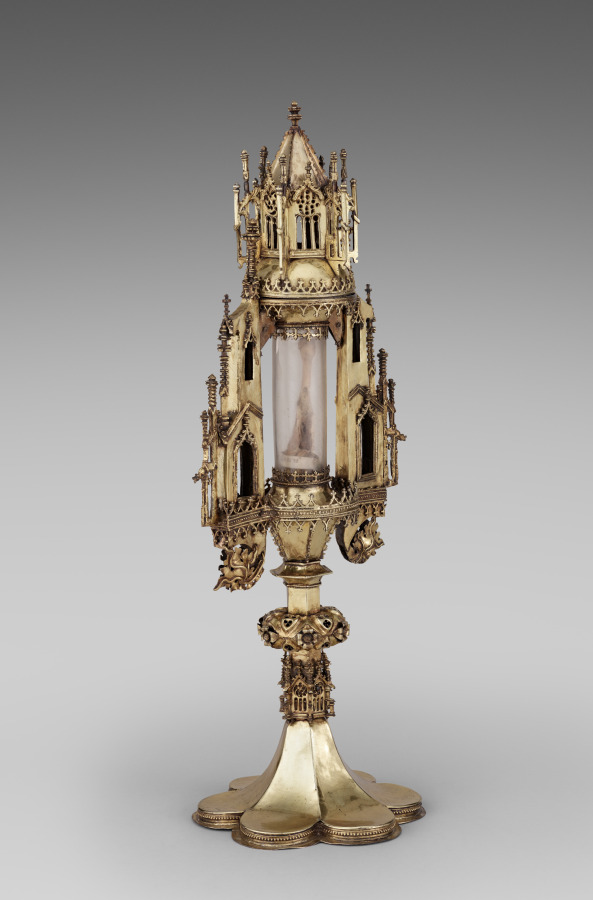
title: Monstrance with a Relic of Saint Sebastian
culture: Germany, Lower Saxony, Brunswick, Gothic period, 15th century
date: 1484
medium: gilded silver, rock crystal, bone, parchment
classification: Metalwork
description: This Late Gothic monstrance (from the Latin monstrare, "to show") is mentioned in the earliest inventory of Saint Blaise as "a large new monstrance containing relics of Saint Sebastian the martyr." Judging from surviving receipts, the reliquary was made by Werner Korff, a local goldsmith, who received payments for silver and gilding at the end of 1484. The reliquary was first displayed on the altar of the church of Saint Blaise in a solemn penitential mass on June 4, 1484, in an effort to ward off the plague. A recent examination revealed that the relic is a human metatarsal bone (one of five long bones of the human foot) and that its owner seemed to have suffered from periostitis, a medical condition that affects the connective tissue surrounding the bone.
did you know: In the Middle Ages, people suffering from diseases might make a journey, or pilgrimage, to venerate relics such as this one. The faithful believed that the remains of saints and holy people like Saint Sebastian could help those seeking aid such as relief from the plague.